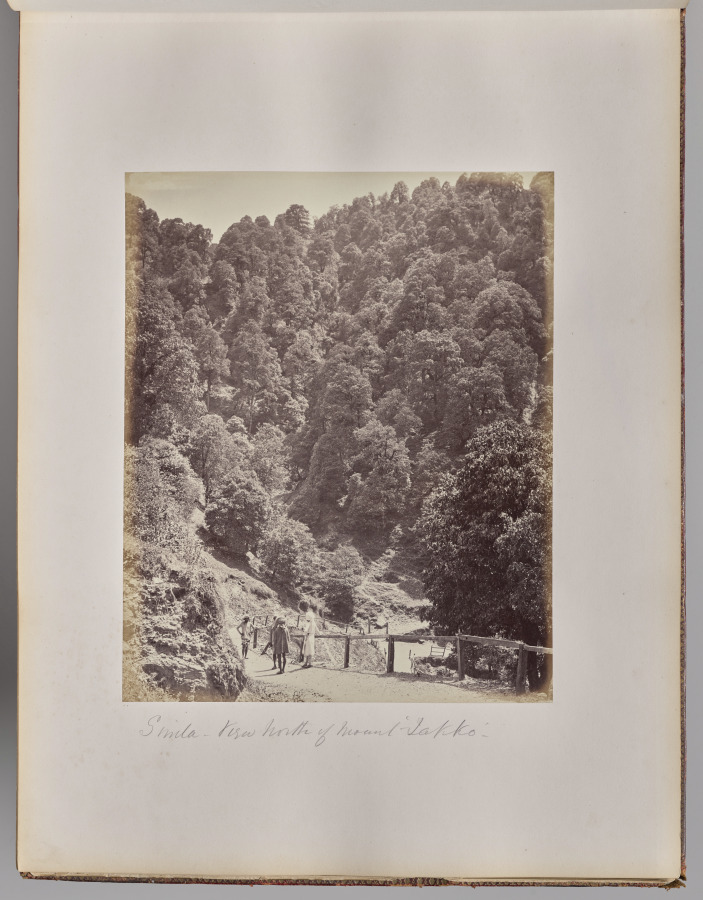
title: Shimla. View North of Mount Jakko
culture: England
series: Photographs of Northern India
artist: Samuel Bourne (British, 1834–1912)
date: 1863–70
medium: albumen print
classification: Photograph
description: The 50 images in this album, all taken in the 1860s, move from the hill towns of the Himalayas down to cities including Lahore (now in Pakistan), Delhi, Lucknow, Agra, Benares (now Varansi), and Calcutta (now Kolkata). Architectural studies of major monuments offer valuable historical records of what sites such as the Taj Mahal and the imperial mosque of the Mughal emperors in Delhi looked like before 20th-century restorations.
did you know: Samuel Bourne, the author of most the images in this album, was a banker in England before he moved to India to become a professional photographer.